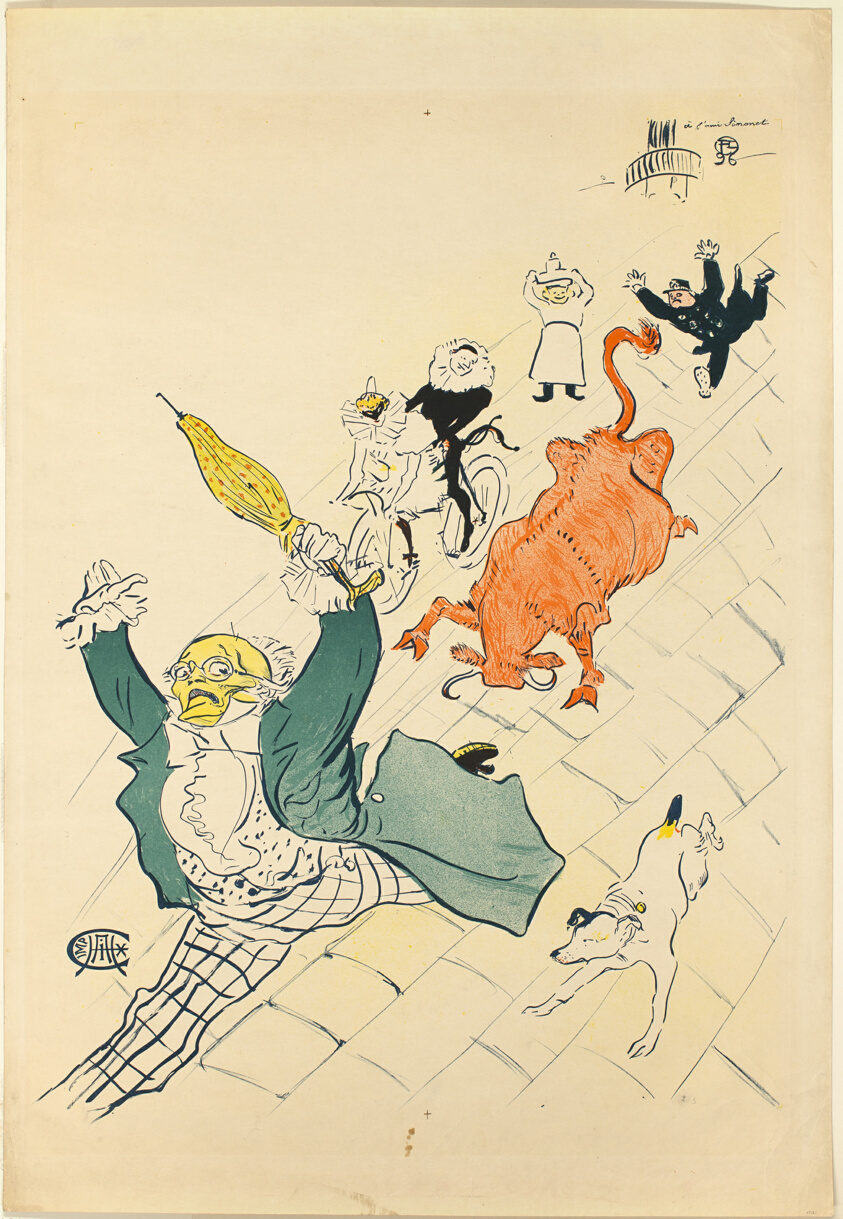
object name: Print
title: La vache enragée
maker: Henri de Toulouse-Lautrec (French, 1864-1901)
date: 1896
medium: Color lithograph poster on cream wove paper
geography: France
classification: lithograph; print; prints and drawing; poster